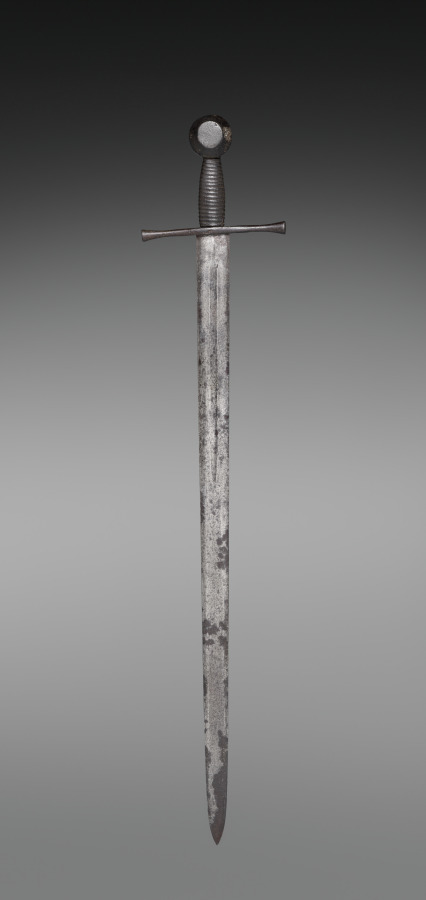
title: Sword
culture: Germany (?)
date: 1400s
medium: steel; wood and leather grip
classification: Arms and Armor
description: During medieval times, everyday objects carried deep spiritual meanings. The knight's sword was perceived as the noblest of weapons because its shape symbolized the cross on which Christ died.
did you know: The unornamented surfaces and signs of use on this sword and those similar to it lead us to believe that they were used in battle. Despite their utilitarian purpose, the blacksmith added details to the handles and hilts to make them visually appealing.